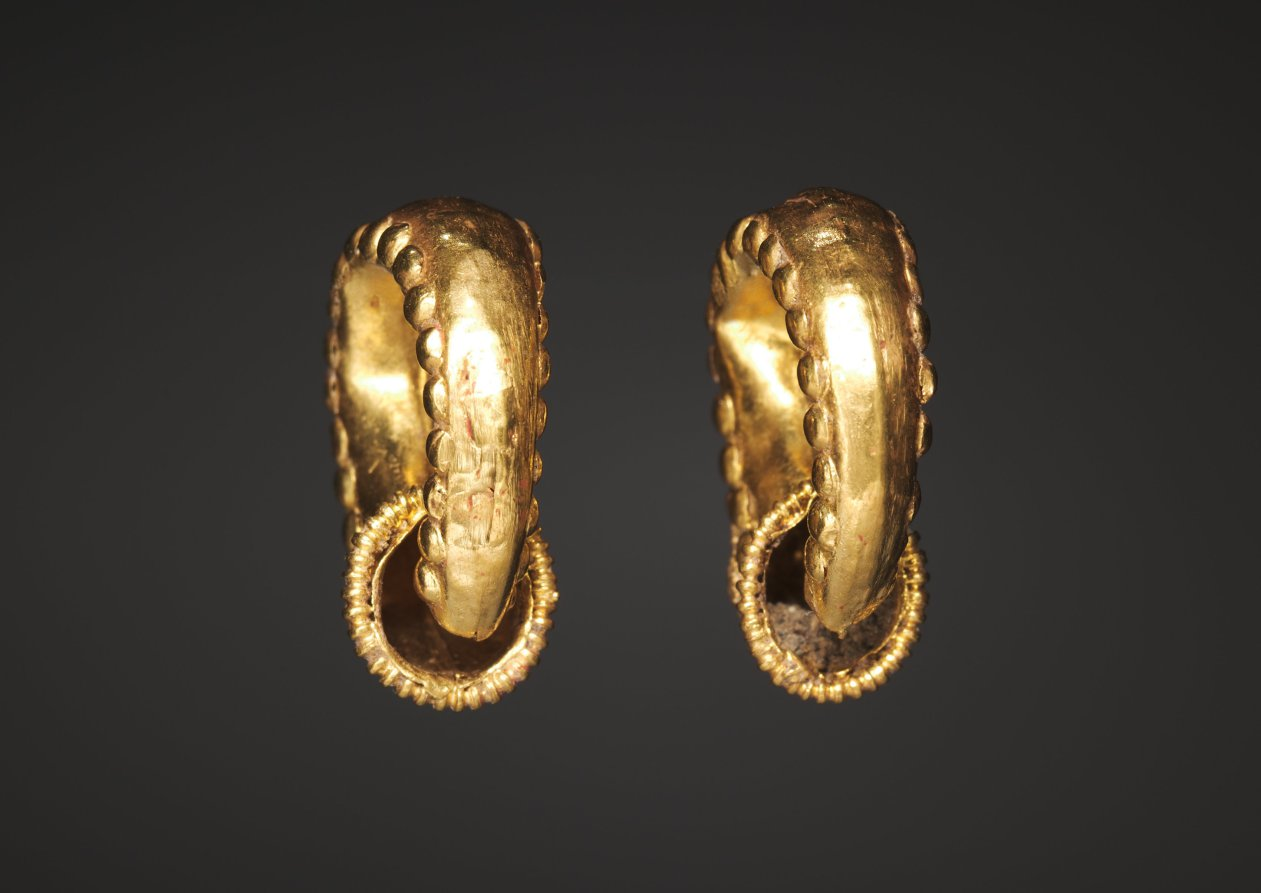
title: Pair of Earrings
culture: Etruscan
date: 300s BCE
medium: gold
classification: Jewelry